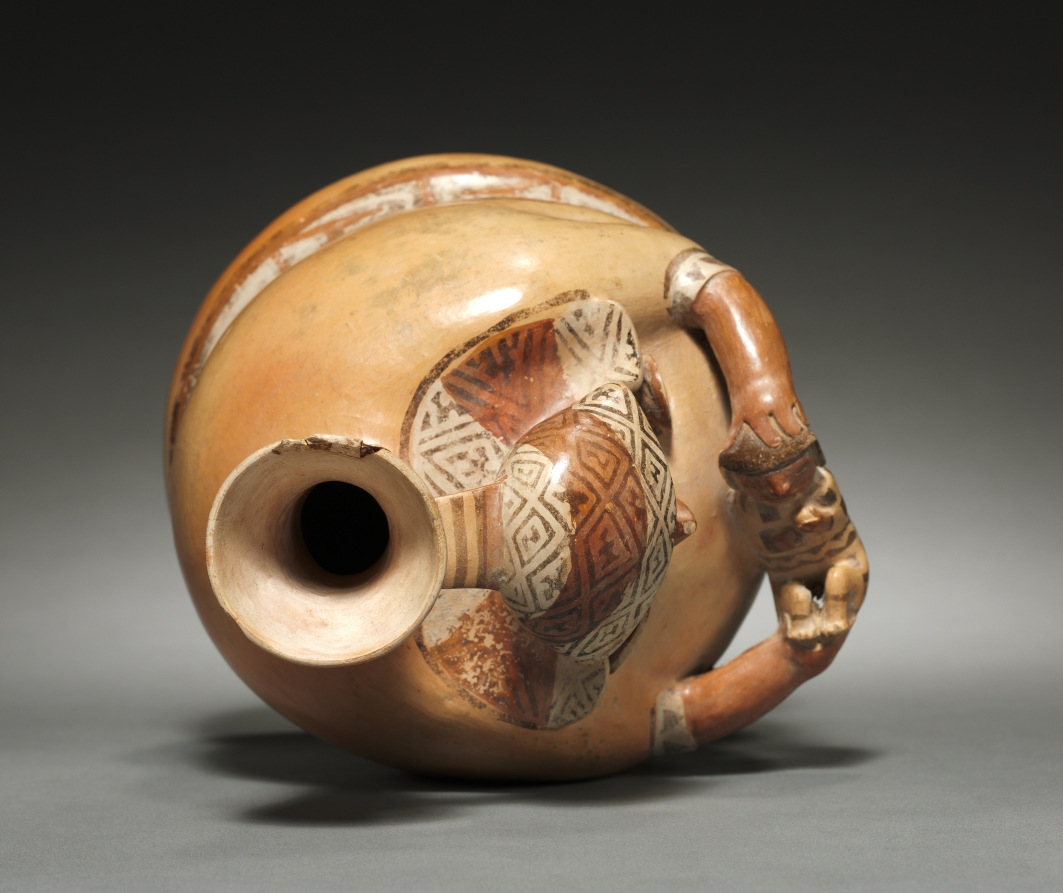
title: Mother-and-Child? Vessel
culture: Central Andes, North Highlands, Recuay people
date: 1–700 CE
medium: ceramic, slip, pigment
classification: Sculpture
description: Well-dressed, important women like this one are depicted fairly often in Recuay art. These women hold a variety of things, ranging from cups that may refer to feasts held on important political occasions to small figures commonly interpreted as children, as here. These and other representations have led scholars to suggest that Recuay women held authority independent of their male partners; their authority may have stemmed in part from involvement in feasting celebrations.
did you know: Recuay ceramics typically use only three colors: black, white, and red.